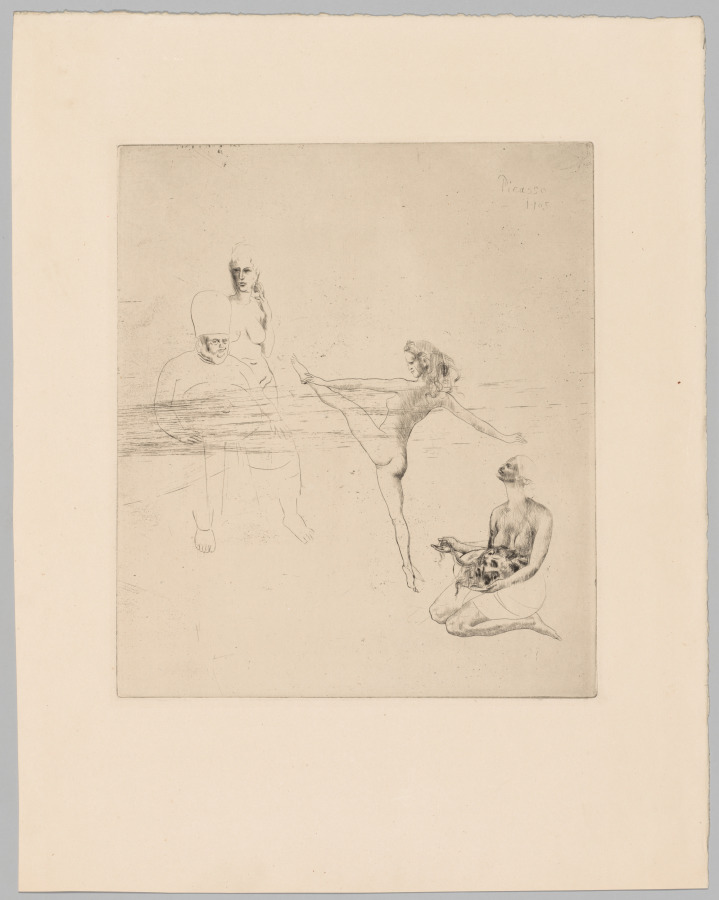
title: Salomé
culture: Spain, 20th century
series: The Saltimbanques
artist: Pablo Picasso (Spanish, 1881–1973)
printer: Louis Fort (French, active 1800s–1900s)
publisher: Ambroise Vollard (French, 1867–1939)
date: 1905, printed 1913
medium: etching and drypoint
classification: Print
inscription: Signed, upper right, in plate: Picasso / 1905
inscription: Watermark: VAN GELDER ZONEN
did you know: Around the same time that Picasso made this etching, his friend Guillaume Apollinaire also wrote a poem about the biblical figure of Salomé.